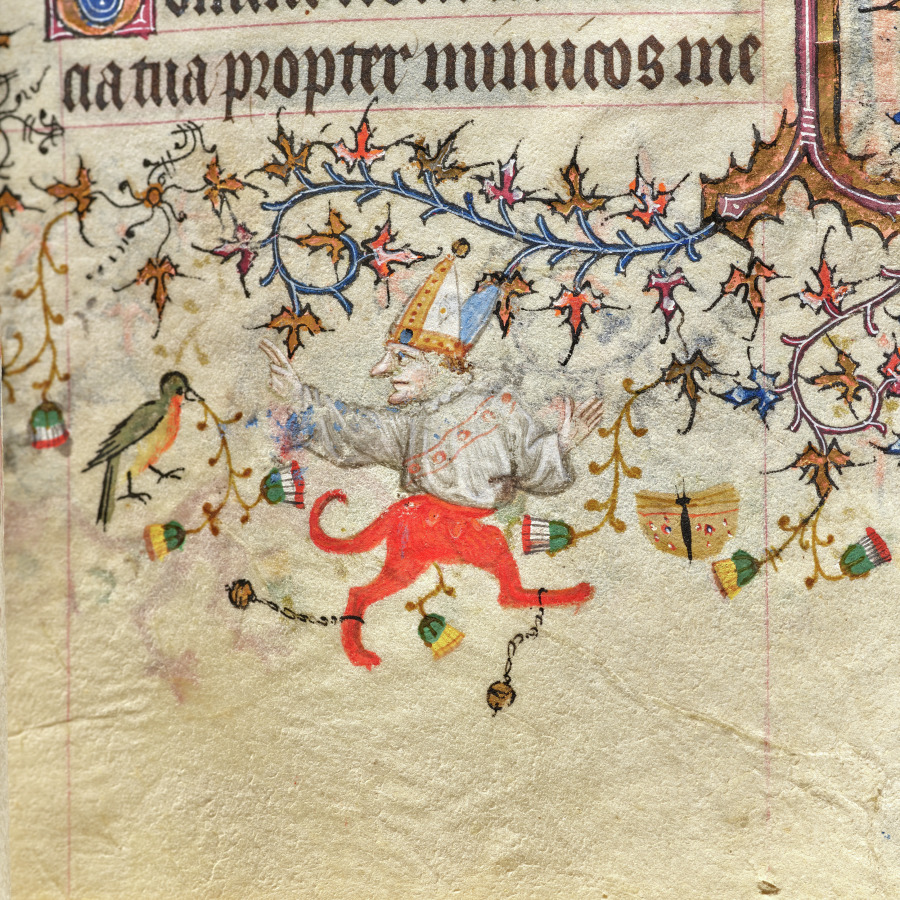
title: Hours of Charles the Noble, King of Navarre (1361-1425): fol. 71r, Text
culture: France, Paris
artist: Master of the Brussels Initials and Associates (French)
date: c. 1405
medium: ink, tempera, and gold on vellum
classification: Bound Volume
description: This precious volume was obviously highly prized by its owner, the French-born King of Navarre, who had his coat of arms painted on no less than twenty folios. Rather than directly commissioning this manuscript from a specific workshop, it seems that Charles the Noble acquired his book of hours -- perhaps ready-made for the luxury market -- while on a trip to Paris in 1404-05. A collaborative effort, six painting styles are evidenced within the pages of this codex, those of two Italians, two Frenchmen, and two Netherlanders. The painter who was responsible for the planning and decoration of the book, and who produced seventeen of the large miniatures, was a Bolognese artist known as the Master of the Brussels Initials. His principal assistant, responsible for most of the borders, was a Florentine who signed his name "Zecho" da Firenze on folio 208 verso.